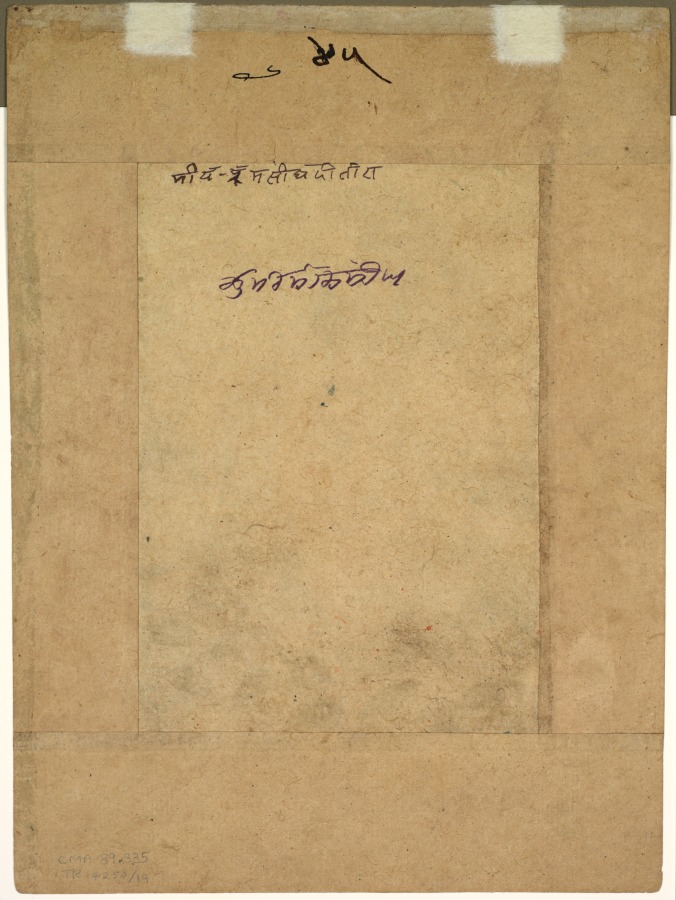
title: Virahini Nayika, Love-Torn Heroine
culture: India, Pahari Hills, Kangra school, late 18th-early 19th Century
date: c. 1800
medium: Gum tempera, ink, and gold on paper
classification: Painting